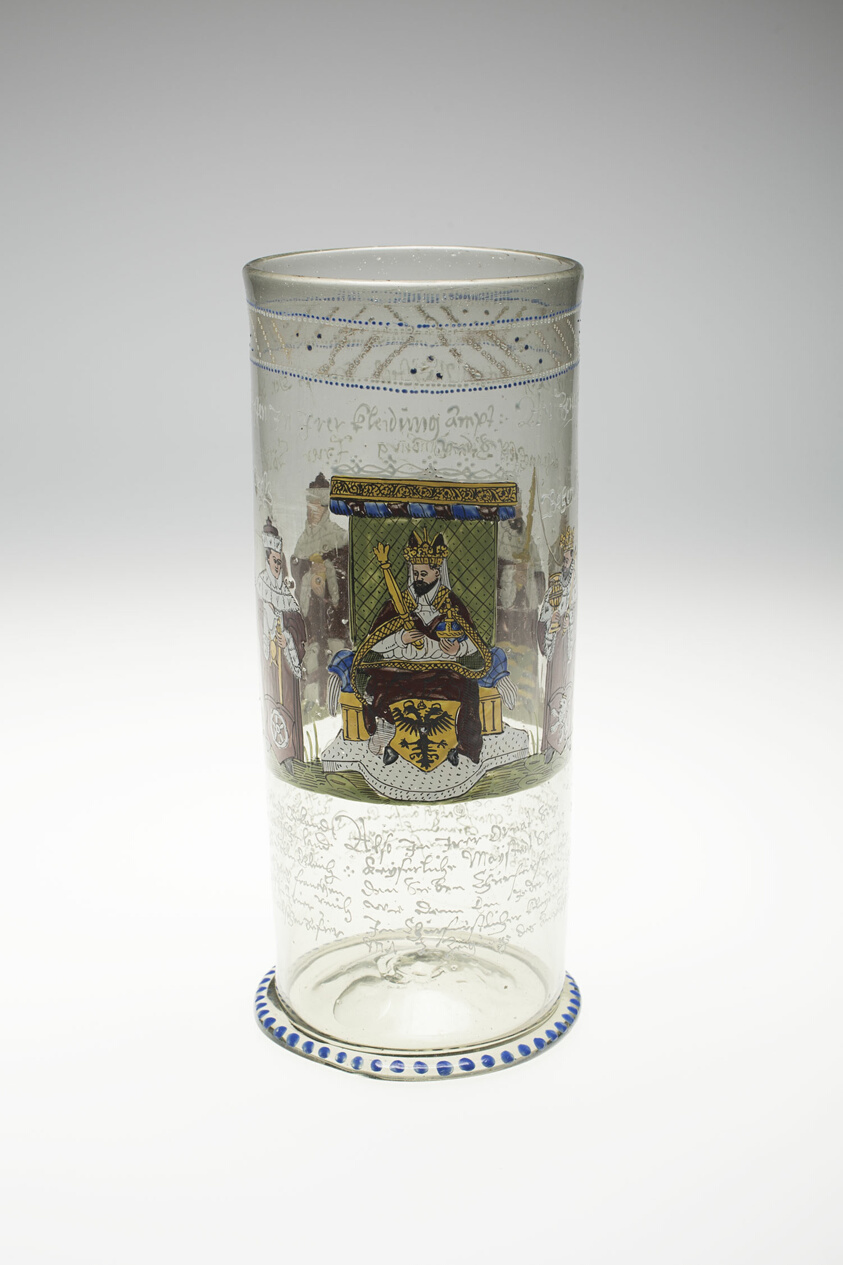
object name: Glass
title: Beaker with the Emperor and Seven Electors (Kurfürsten Humpen)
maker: Bohemian or German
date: c. 1600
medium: Colorless glass, enamel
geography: Germany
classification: drinking vessel; glass; european decorative arts